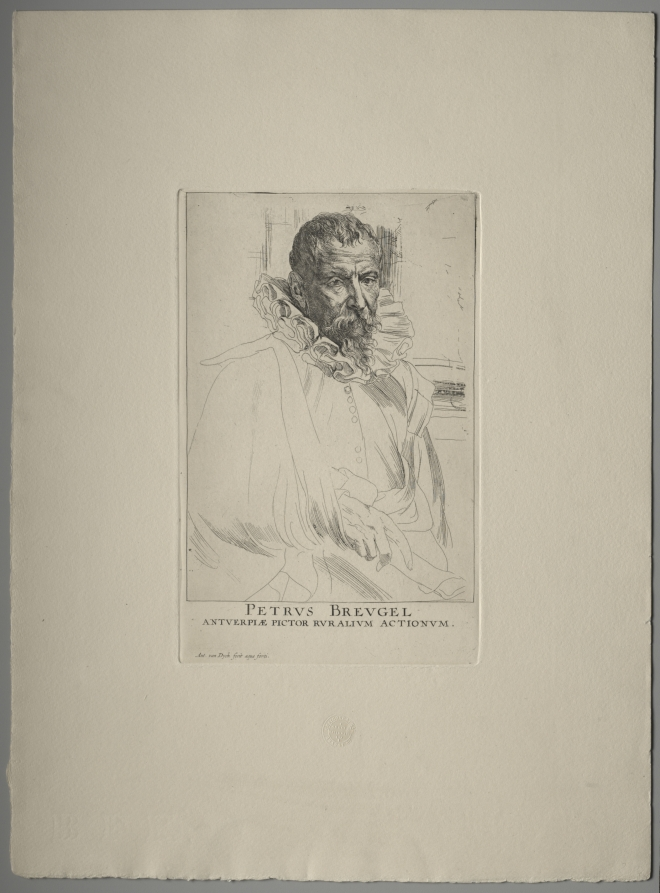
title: Pieter Brueghel the Younger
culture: Flanders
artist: Anthony van Dyck (Flemish, 1599–1641)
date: 1630–33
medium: etching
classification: Print